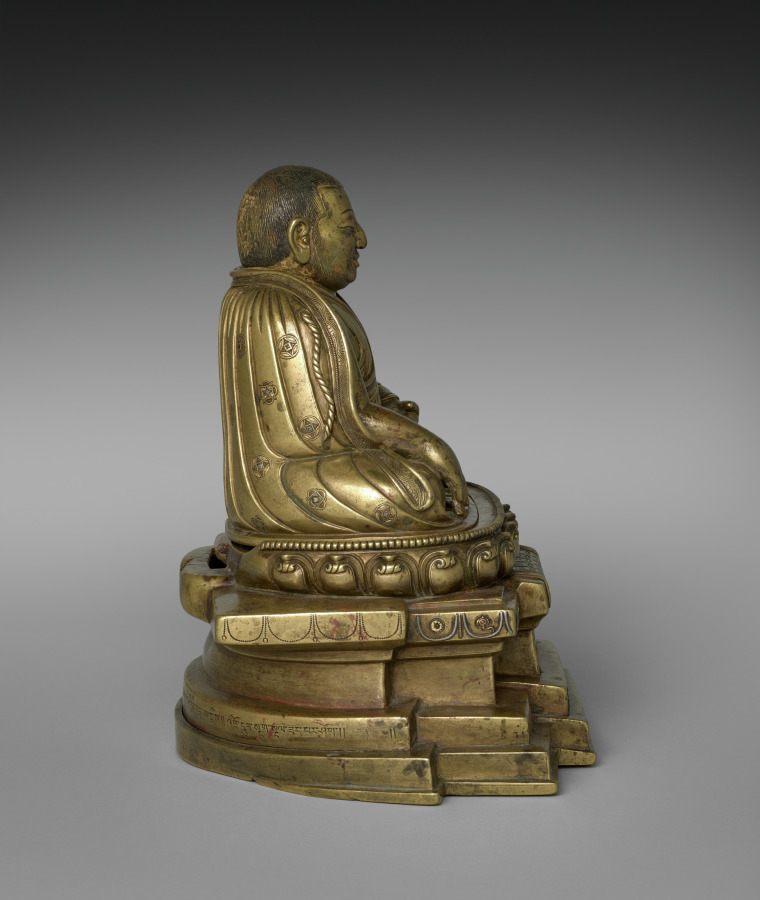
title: Portrait of Phagmo Drupa Dorje Gyalpo (1110–1170)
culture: Central Tibet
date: 1200s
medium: gilt bronze with gold, silver, copper, turquoise, lapis, and coral inlay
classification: Sculpture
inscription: / / Na mo 'ghu ru / / Ngan lam ban chung bdag gis ni / / bla ma Rin chen sku bzhengs pa yi / / bsod nams 'di yi byin brlabs kyis / / 'gro drug sdug sngal zad par shog / / Translation: "Salutations to the master ! May the sufferings of the six kinds of beings be appeased through the blessing of merit gained by me, the little monk of Ngan.lam, in having this statue of the Lama Rin.chen made."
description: This portrait statue depicts the first monastic leader of the prominent Buddhist monastery of Densatil, an influential early leader of the Tibetan Buddhist monastic order called Kagyu, famous for his views on the importance of meditation. He sits on a lotus pedestal and lion throne, like a Buddha, and his hand positions (mudras) communicate that meditation leads to enlightenment.